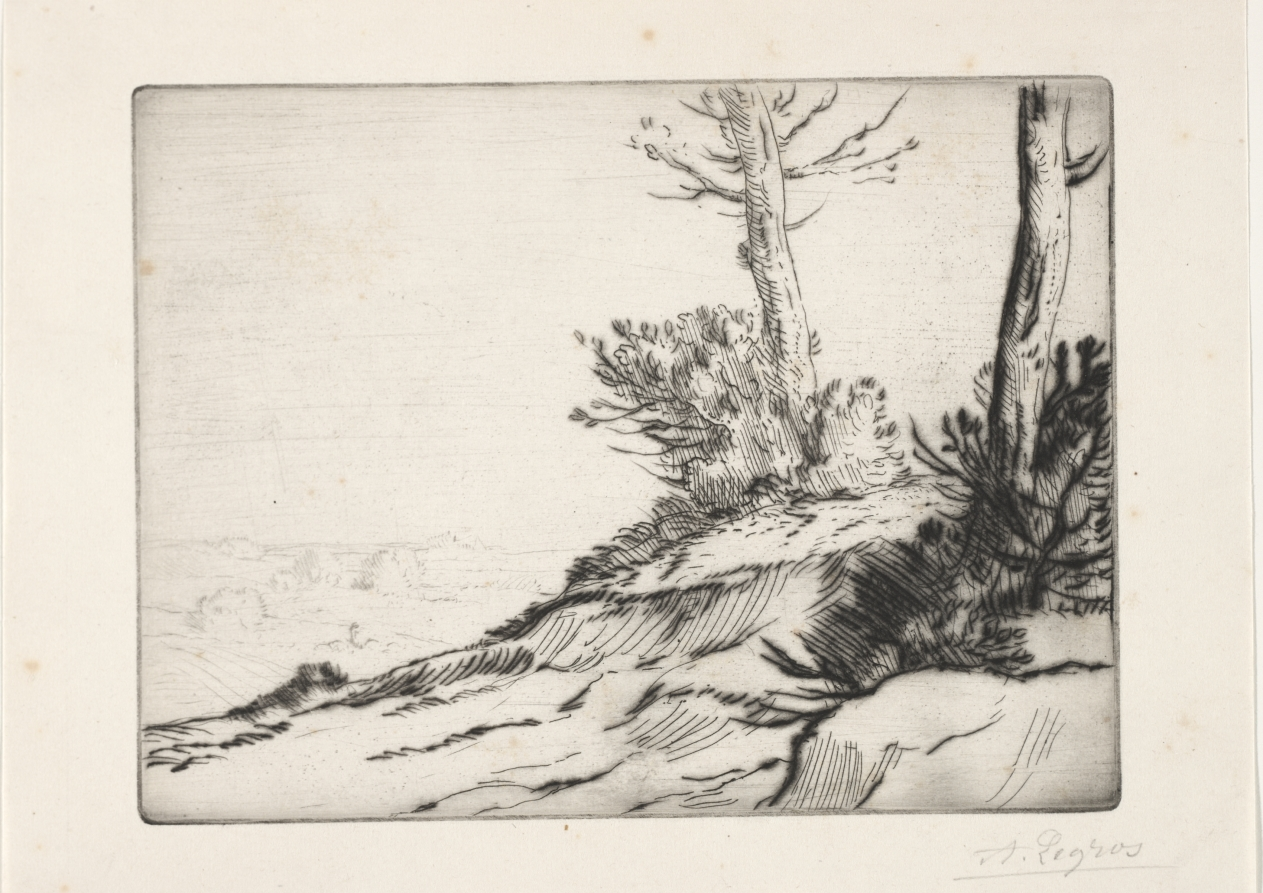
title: La butte aux broussailles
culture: France, 19th-20th century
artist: Alphonse Legros (French, 1837–1911)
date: c. 1857–1911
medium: etching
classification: Print